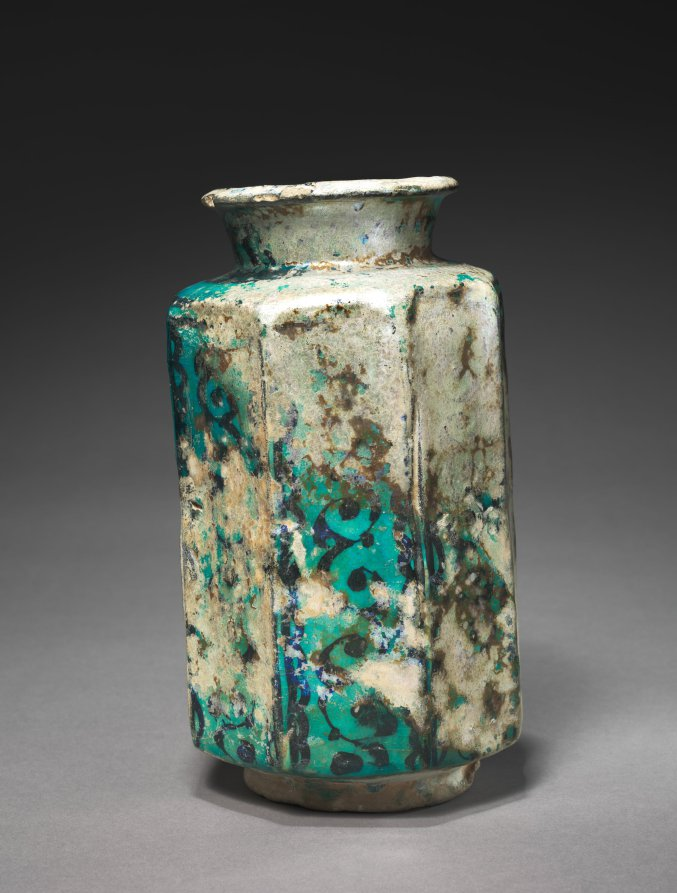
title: Albarello Jar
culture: Syria (Raqqa), Ayyabid Period, 13th Century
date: 1200s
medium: fritware with underglaze-painted design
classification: Ceramic